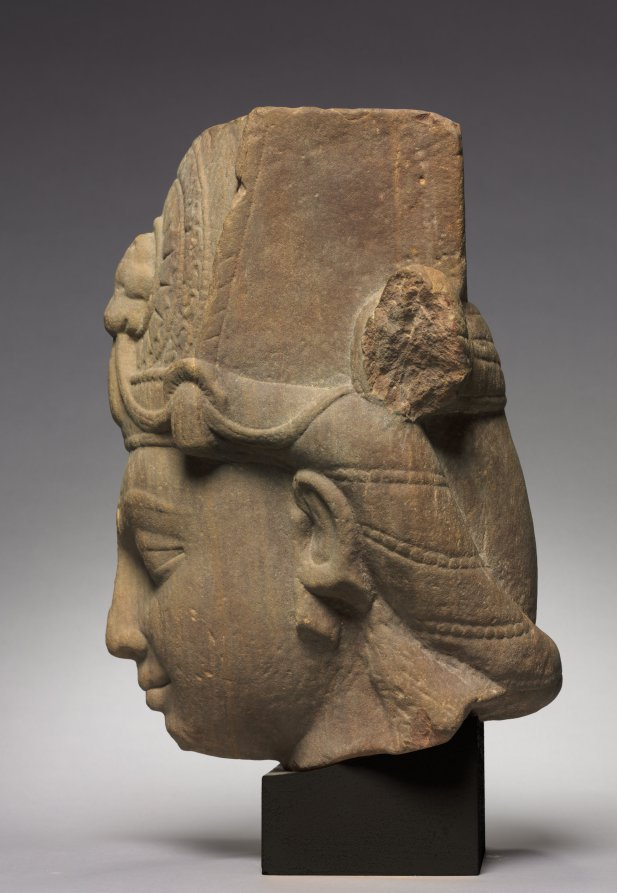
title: Head of Vishnu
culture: Central India, Madhya Pradesh, Vidisha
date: 300s CE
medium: sandstone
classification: Sculpture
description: When complete, this iconic image of the Hindu god Vishnu would have been impressive in scale, approximately life-size. During the Gupta period (c. 319–550 CE), images of Vishnu included a lion head in the center of the crown. The lion communicated royal authority, solar radiance, and the concept of glory. These attributes characterize the power and personality of this deity who ensures the preservation of his creation.